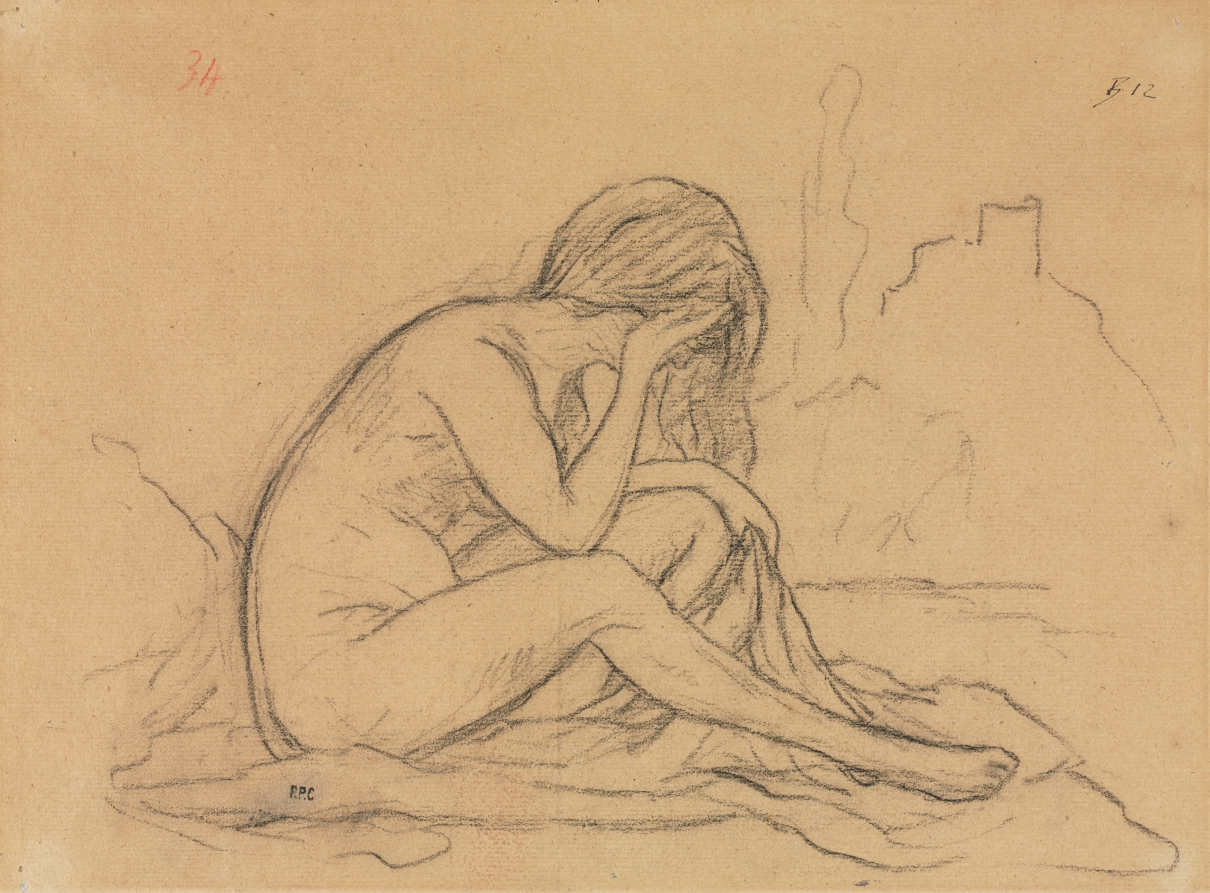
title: Study of a Female Nude (possibly for an unrealized allegorical painting) (recto)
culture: France, 19th century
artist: Pierre Puvis de Chavannes (French, 1824–1898)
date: 1800s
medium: black chalk stumped with heightening of white chalk on brown paper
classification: Drawing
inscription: inscribed upper left center in red pencil: 34; inscribed upper right in black ink: B12